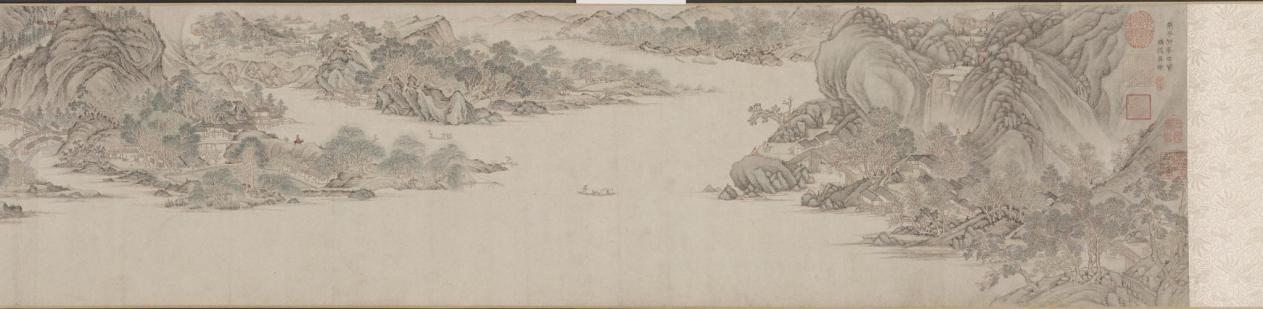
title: Greeting the Spring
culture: China, Ming dynasty (1368–1644)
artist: Wu Bin (Chinese, active c. 1591–1626)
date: 1600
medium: handscroll; ink and light color on paper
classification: Painting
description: This masterfully composed landscape in light colors and delicate brushwork is an image of the water-rich Jiangnan region in southeast China, where Wu Bin was active as an artist. Embedded in rolling hills along lakesides and streams nestle cityscapes hosting numerous spring festivities. Lantern displays and street performances in the villages salute the New Year, and are interwoven with scenes of farming, fishing, and silk making. In one scene in the middle ground, an ox made of clay under a canopy is lead in a procession to an architectural compound, a ceremony known as whipping the spring ox in hope for a good harvest. This handscroll bears five collector seals by the Qianlong emperor indicating his appreciation for the painting.